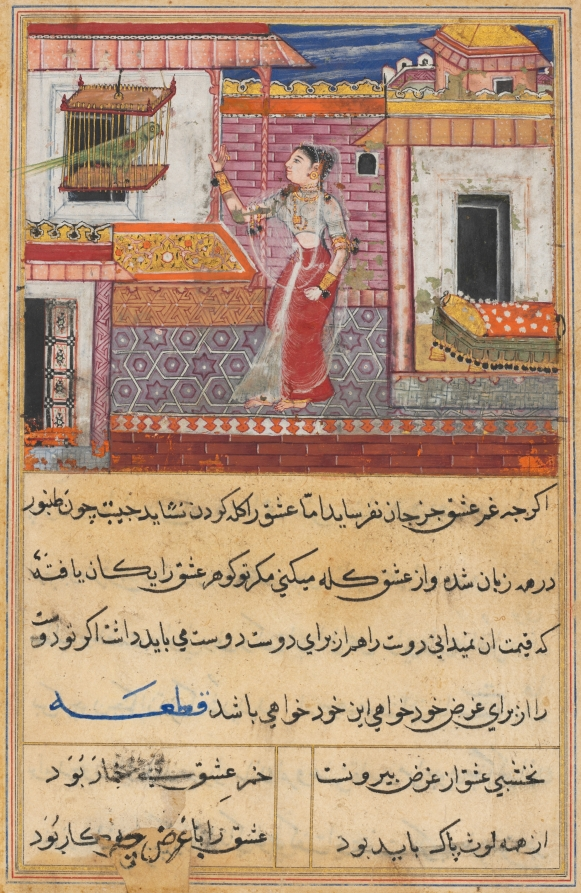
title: The Parrot Addresses Khujasta at the Beginning of the Thirteenth Night, from a Tuti-nama (Tales of a Parrot)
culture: Mughal India, court of Akbar (reigned 1556–1605)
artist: Tara 1 (Indian, active 1550s-1590s)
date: c. 1560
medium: gum tempera, ink, and gold on paper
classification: Painting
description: Before Khujasta can leave to meet her lover, Tuti the talking parrot begins to tell her a story of the conference of eighty wise men and the infant prince who was judged by his musical tastes.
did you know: The bricks in the courtyard were originally painted orange.